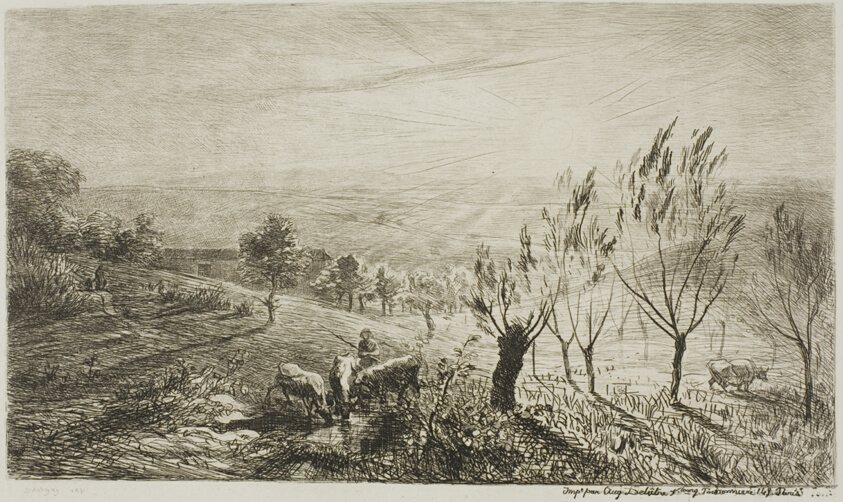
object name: Print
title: Sunrise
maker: Charles François Daubigny (French, 1817-1878)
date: 1850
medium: Etching on ivory wove paper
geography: France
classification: etching; print; prints and drawing